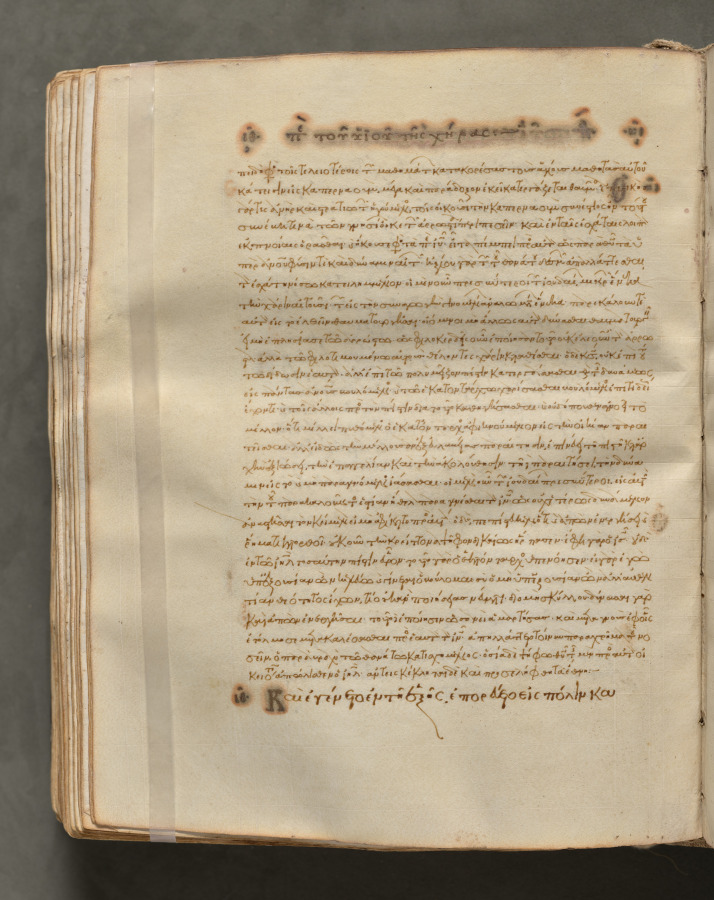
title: Text, folio 232 (verso), from a Gospel Book with Commentaries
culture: Byzantium, Constantinople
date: c. 1000–1100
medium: ink, tempera, and gold on vellum; leather binding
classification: Bound Volume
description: Each of the four gospels in this book opens on a page with brilliantly illuminated borders depicting the author of the text as well as birds—principally peacocks, symbols of the immortality of the soul—and fountains, representing the fountain of life and the salvation of the soul. This volume consists of 428 leaves with texts in Greek. Its level of sophistication suggests that it was probably written and decorated in a monastery in Constantinople.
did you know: Gospel books were carried in procession through Byzantine churches.